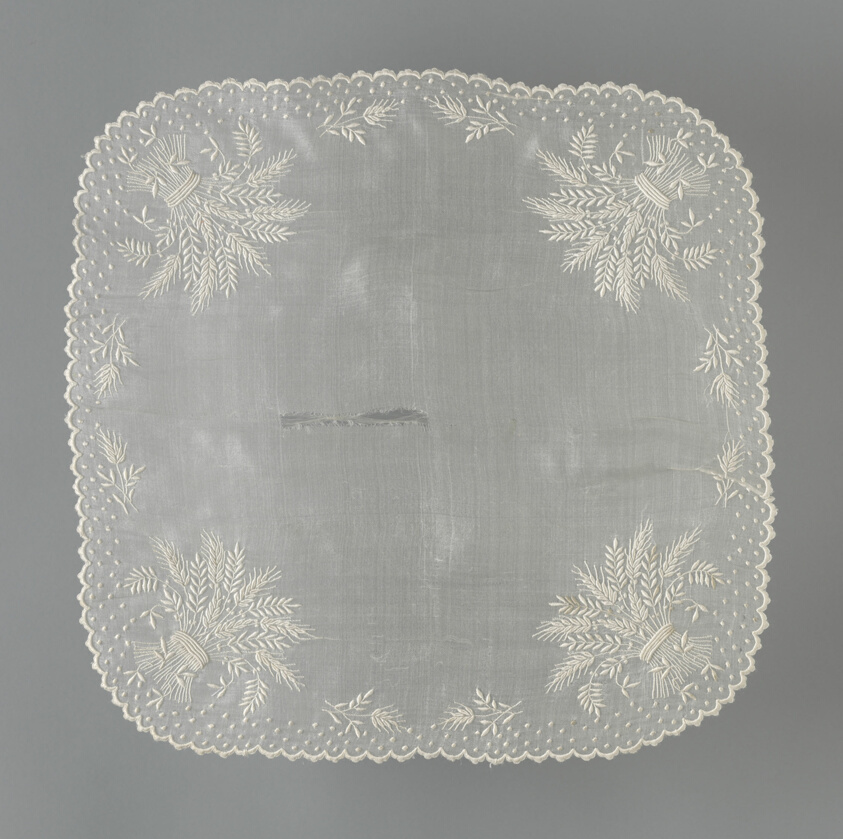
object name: Textile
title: Handkerchief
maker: France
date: 1825/75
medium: Silk, plain weave; embroidered with silk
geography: France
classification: textile; costume; needlework (visual works); weaving; accessories (object genre)